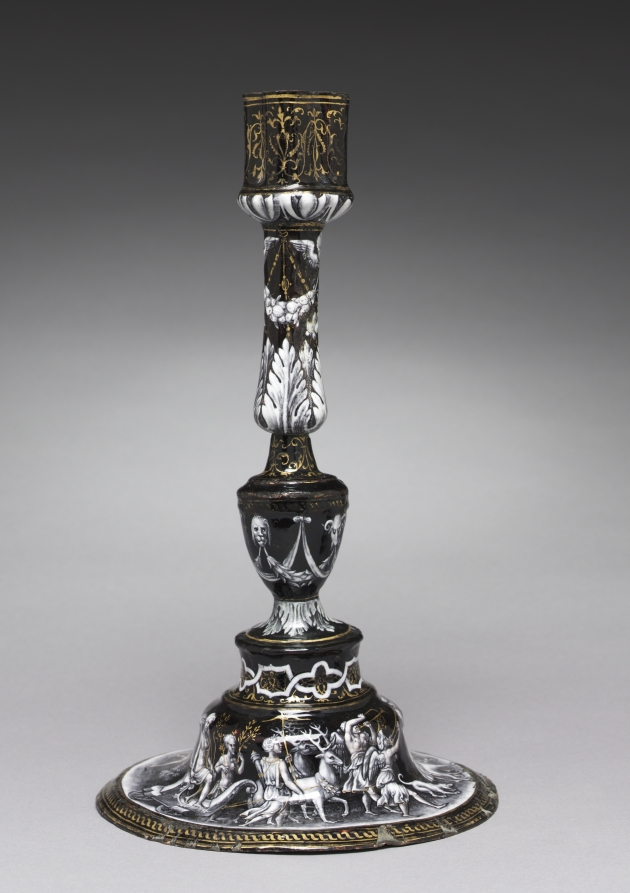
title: Candlestick Depicting the Triumph of Diana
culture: France, Limoges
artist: attributed to Jean II de Court (French, before 1583)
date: c. 1565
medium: painted enamel (grisaille) on copper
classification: Enamel